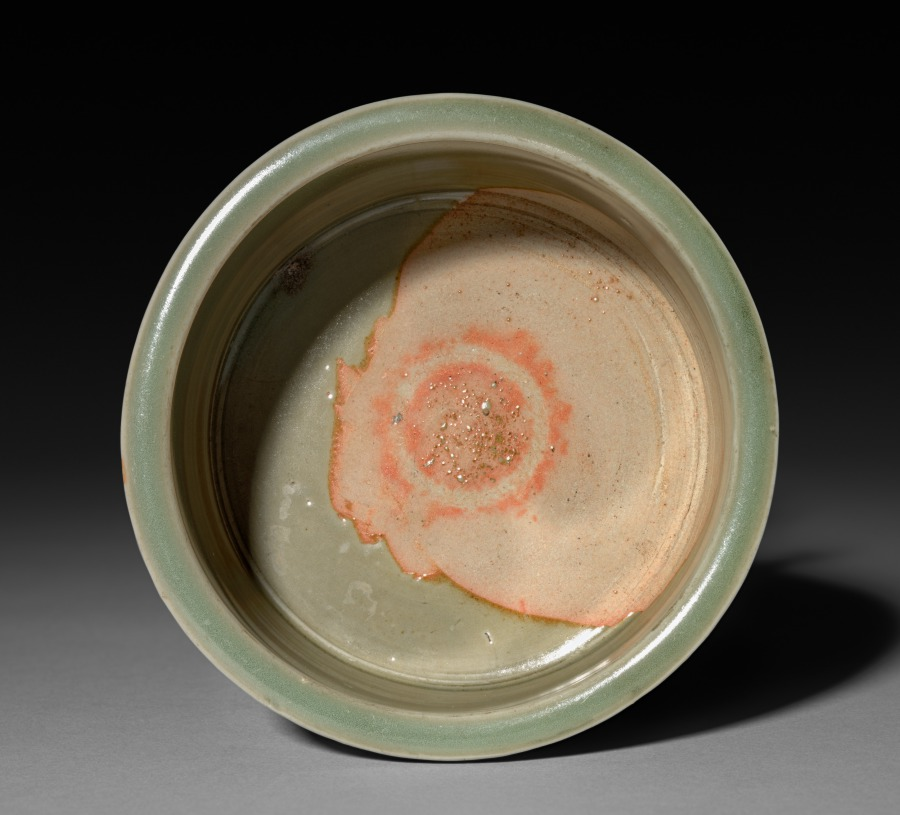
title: Incense Burner in Form of Archaic Lian with Peonies in Relief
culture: China, Zhejiang province, Yuan dynasty (1271-1368)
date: 1300s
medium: Glazed porcelain with molded decoration, Longquan ware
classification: Ceramic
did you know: In East Asian art, peonies traditionally symbolize prosperity and wealth.